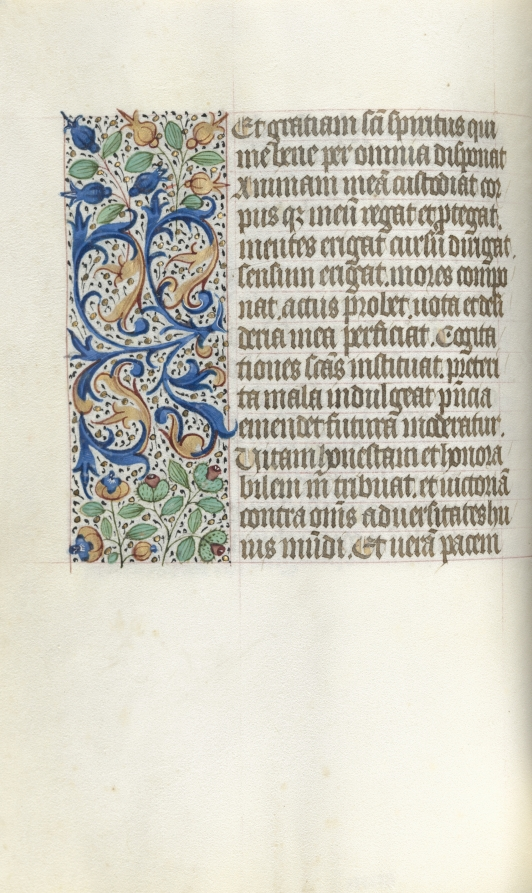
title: Book of Hours (Use of Rouen): fol. 21v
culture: France, Rouen, 15th century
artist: Master of the Geneva Latini (French, active Rouen, 1460–80)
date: c. 1470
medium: ink, tempera, and gold on vellum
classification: Bound Volume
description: In the late 1400s and early 1500s Rouen was an established and important center of book production. The city’s cathedral had a wealthy chapter that spent large sums of money to commission books and to maintain its extensive library. The stationers and booksellers would have likely been concentrated in or near the cathedral precinct. This artist, named after a manuscript now in Geneva, was Rouen’s principal illuminator during the second half of the 1400s.